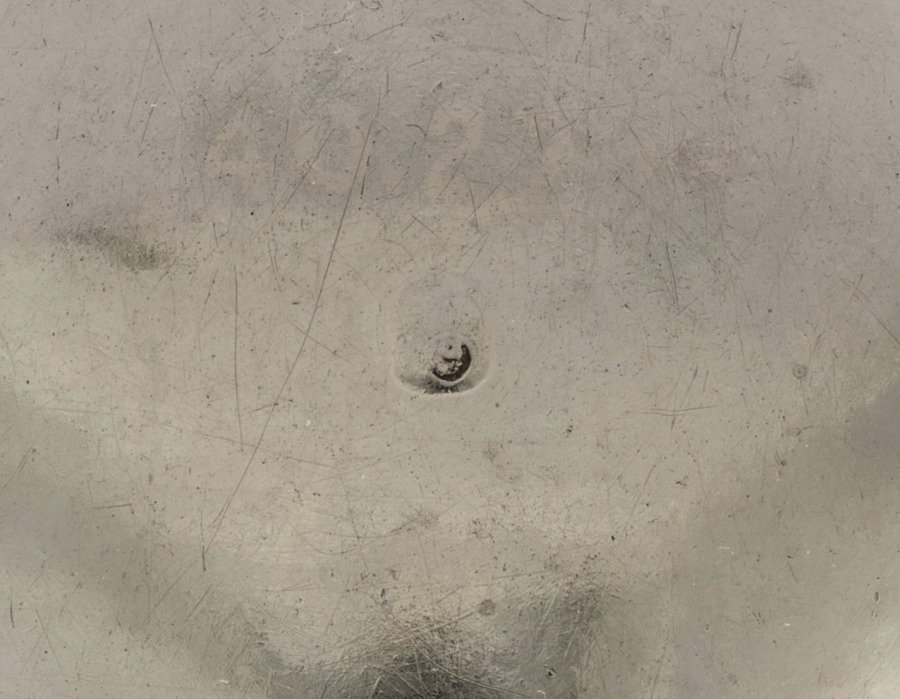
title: Porringer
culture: America, Massachusetts, Boston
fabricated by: Andrew Tyler (American, 1692–1741)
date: c. 1725–30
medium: silver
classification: Silver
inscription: engraved "MC" in block letters on top of handle (facing away from bowl). Scratched underneath handle: "8..12."